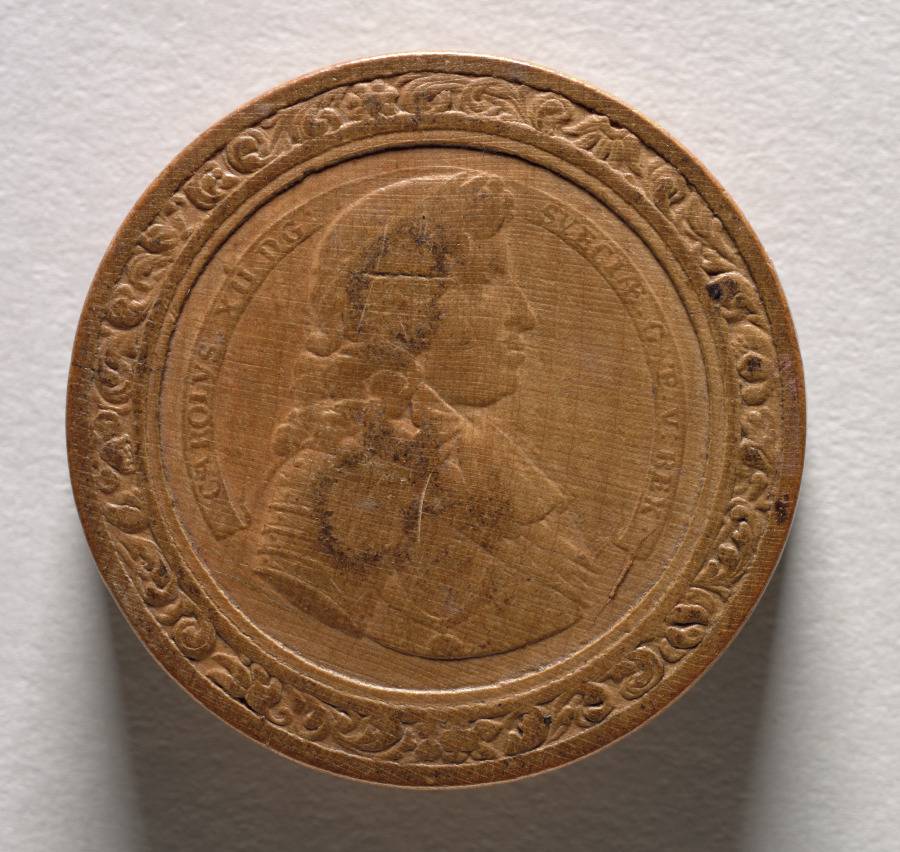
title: Gaming Piece (obverse)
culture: Germany, late 17th-early 18th Century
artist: Martin Brunner (German, 1659–1725)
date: c.1700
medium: wood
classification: Furniture and woodwork